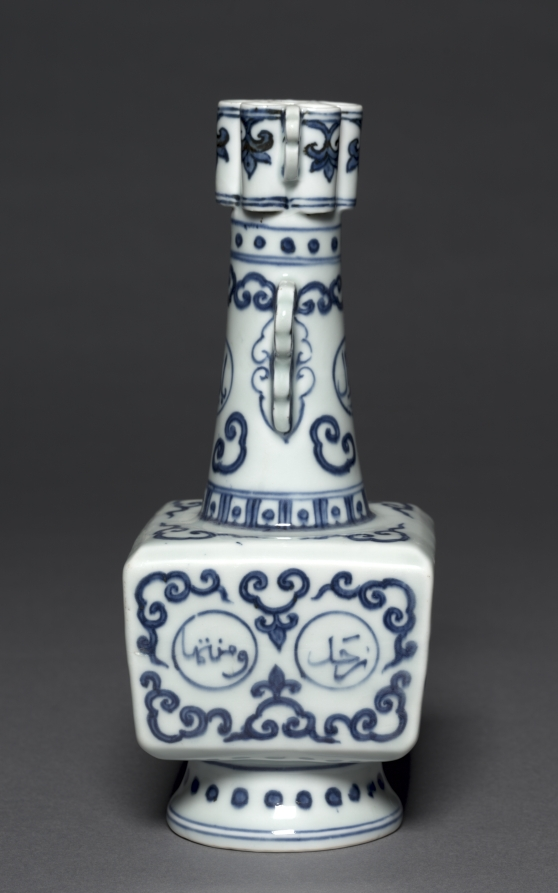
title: Arrow Vase with Persian Inscriptions and Floral Scrolls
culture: China, Jiangxi province, Jingdezhen kilns, Ming dynasty (1368-1644), Zhengde mark and reign (1505-1521)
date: 1506–21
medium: porcelain with underglaze cobalt blue decoration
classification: Ceramic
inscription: The two Persian inscriptions on the neck freely translated read 'Oh Beautiful! Oh Powerful'! Those around the body read 'None knows the extent and limits of Thy power and Majesty.'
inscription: 大明正德年製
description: Chinese potters in the 1500s integrated foreign motifs, shapes, and ideas in order to cater to changing tastes and new customers in an increasingly global world.